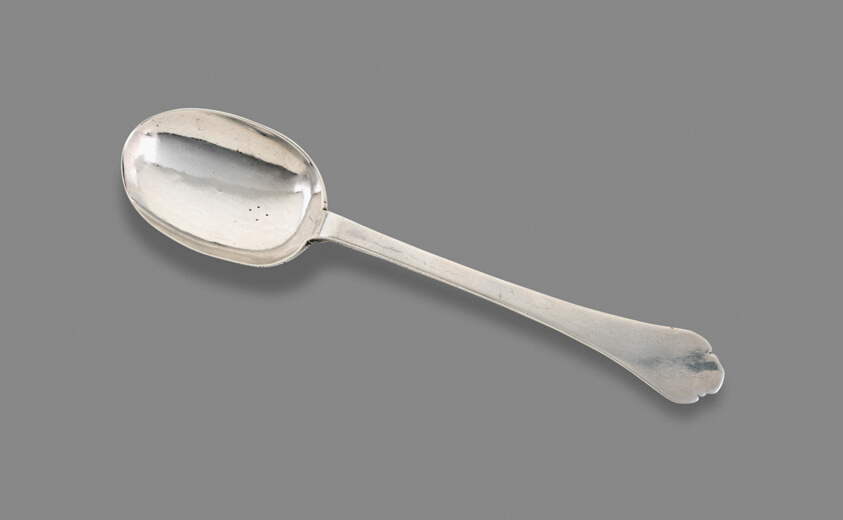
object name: Metalwork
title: Spoon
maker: Jonathan Clarke (American, c.1705–1770); Providence and Newport, Rhode Island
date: 1727–36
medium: Silver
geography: Rhode Island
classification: spoon; utensil; silver; american decorative arts; american arts; decorative arts